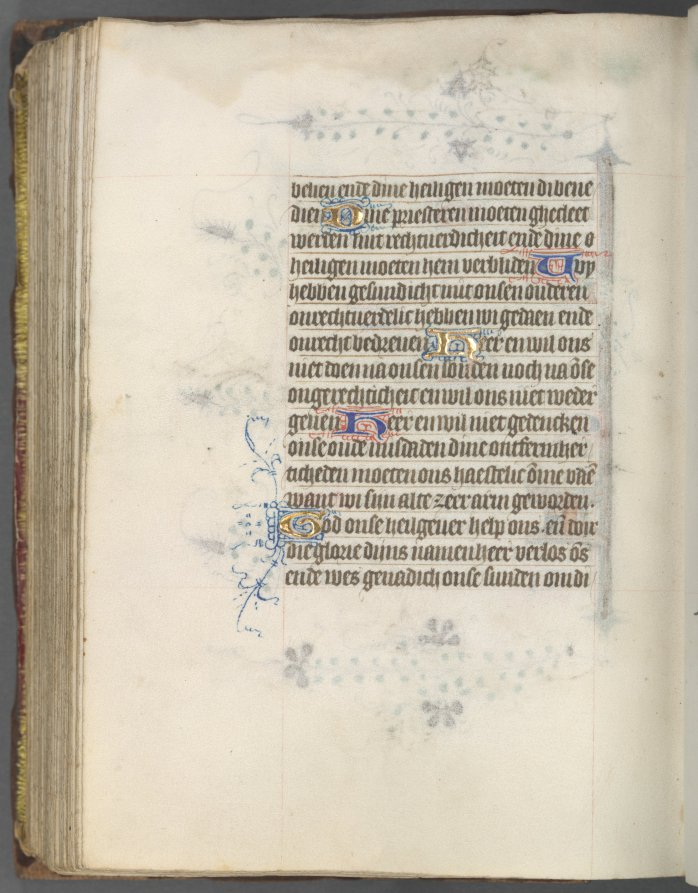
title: Book of Hours (Use of Utrecht): fol. 174v, Text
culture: Netherlands, Utrecht, 15th century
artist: Master of Gijsbrecht van Brederode (Netherlandish)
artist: Master of the Boston City of God (Netherlandish)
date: c. 1460–1465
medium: ink, tempera, and gold on vellum; binding: brown Morocco over original wooden boards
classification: Bound Volume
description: This manuscript is a collaborative effort of two talented illuminators with distinctive styles. Ninety-seven historiated initials (letters containing scenes), including the one on recto (right side) shown here, are by the Master of the Boston City of God, a painter who worked in Utrecht. Four full-page miniatures (small paintings), including the Nativity on the verso (left side), have recently been attributed to the Master of Gijsbrecht van Brederode. The background of the Nativity depicts a distant cityscape (perhaps Utrecht), adjacent to which may be seen the Journey of the Magi and the Annunciation to the Shepherds. In the left margin, the Virgin Mary (above) appears to the Roman Emperor Augustus and the Tiburtine Sibyl, who, according to legend, foretold the coming of Christ. This volume is not written in Latin, but in a Dutch littera textualis, an elegant Gothic bookhand.